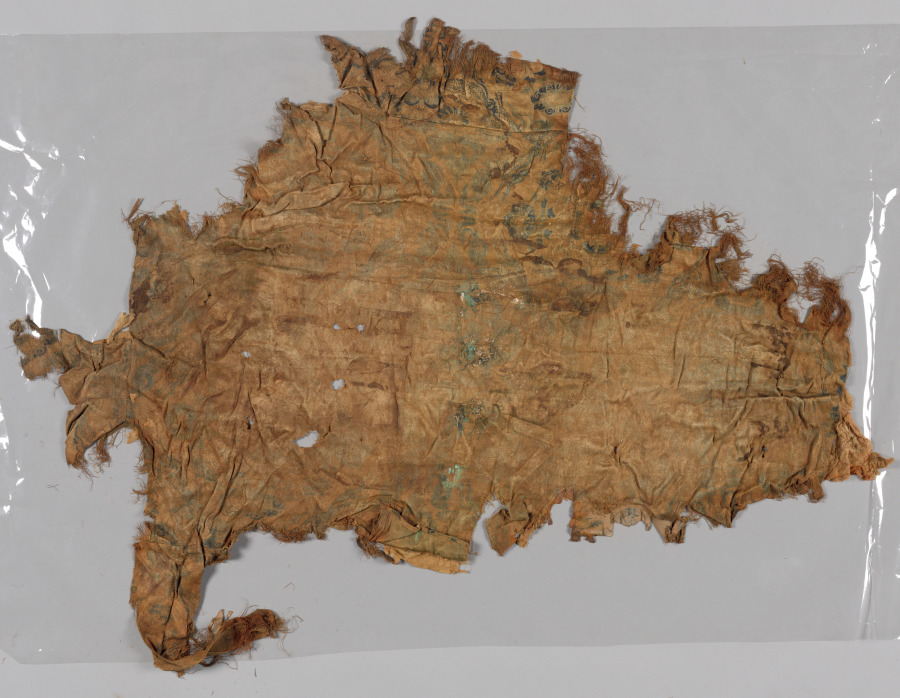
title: Fragment from a Garment (larger fragment)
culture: China, Lao dynasty (907-1125), 10th century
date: 900s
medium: weft-faced compound twill, silk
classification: Textile